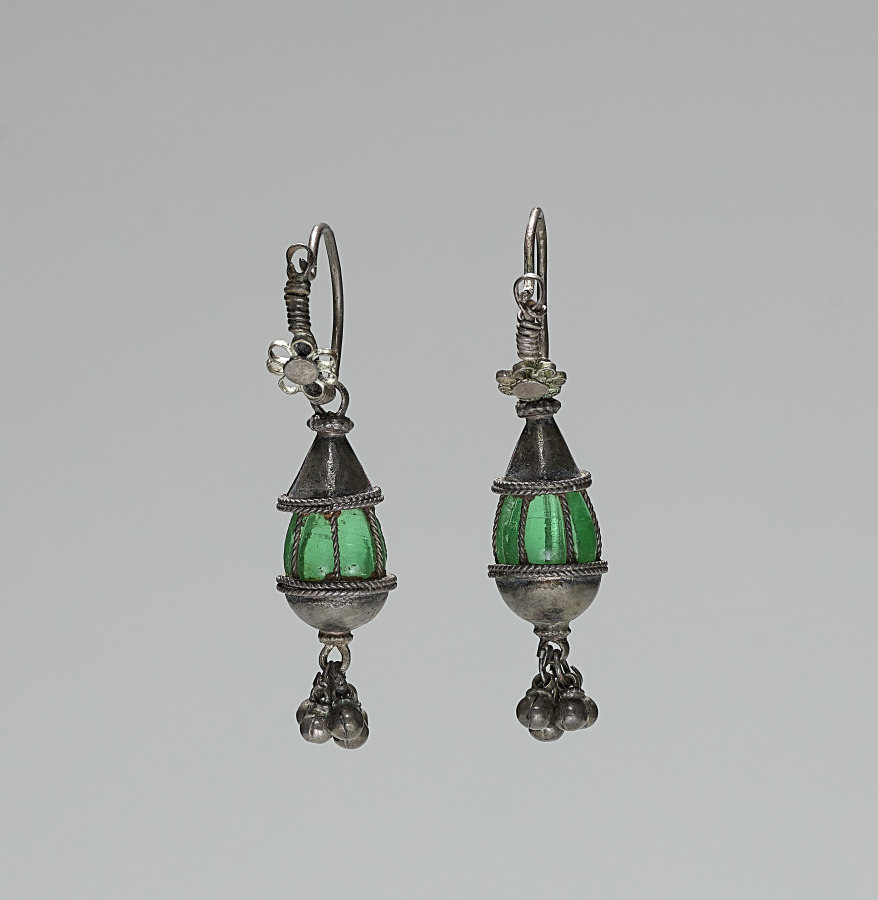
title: Pair of Earrings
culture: India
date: 1800s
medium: silver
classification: Jewelry